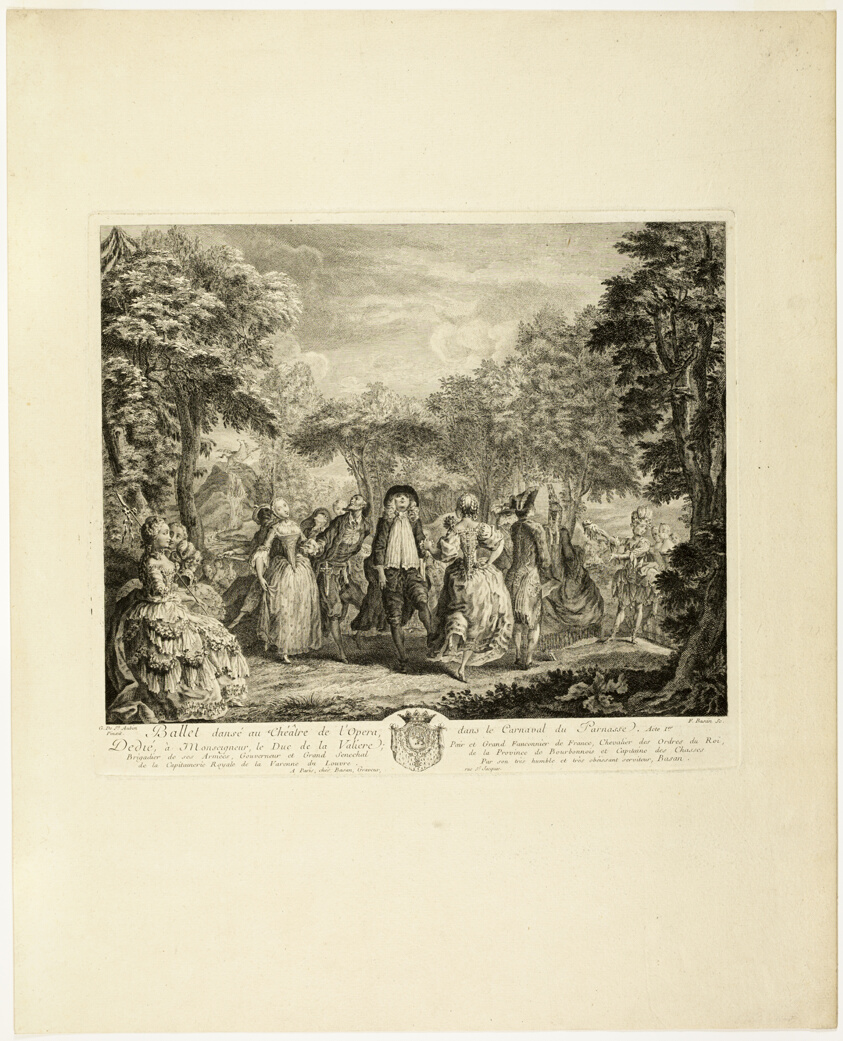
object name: Print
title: The Carnival of Parnassus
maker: Pierre François Basan (French, 1723-1797); after Gabriel de Saint-Aubin (French, 1724-1780)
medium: Etching and engraving in black on cream laid paper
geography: France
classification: etching; paper; print; prints and drawing